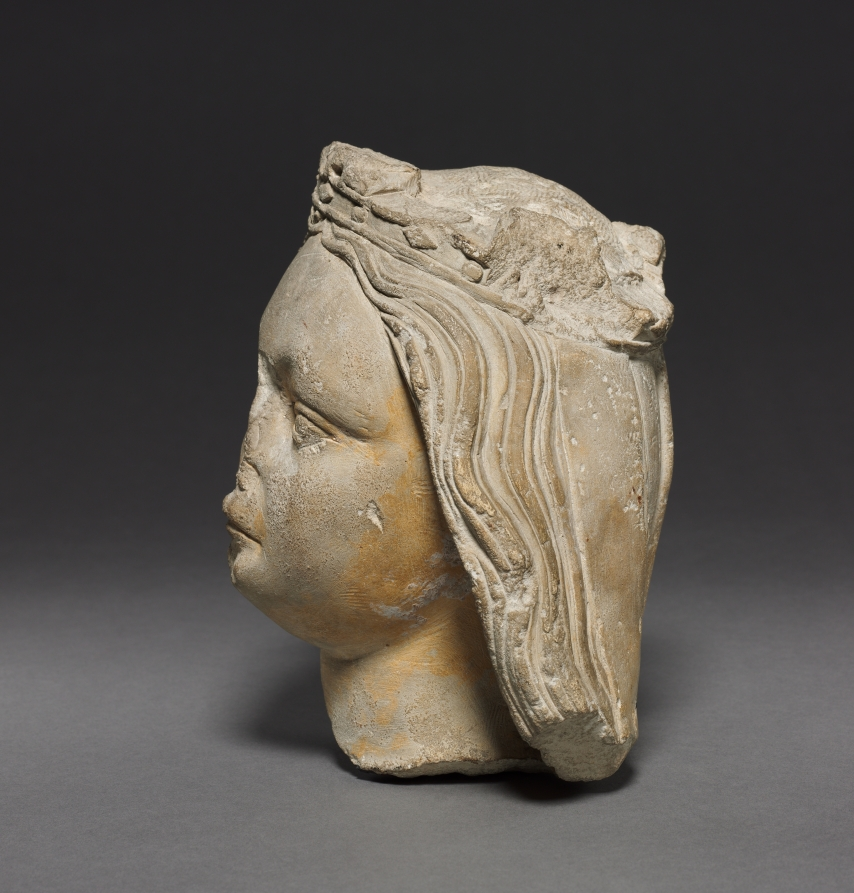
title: Crowned Female Head (Fragment)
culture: France, Champagne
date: c. 1400–1420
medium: limestone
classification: Sculpture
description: The origins of this sculptural fragment are not known. It is perhaps the final trace of the once beautiful figure of a standing Virgin and Child.